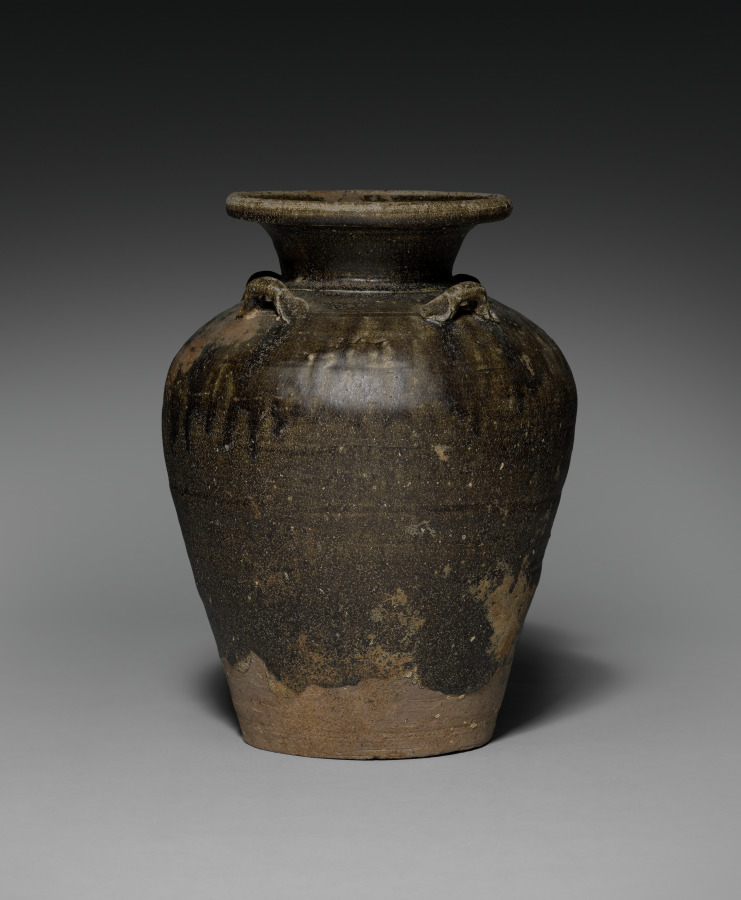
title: Storage Jar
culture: Thailand, Sawankhalok, 14th century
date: 1300s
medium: stoneware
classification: Ceramic